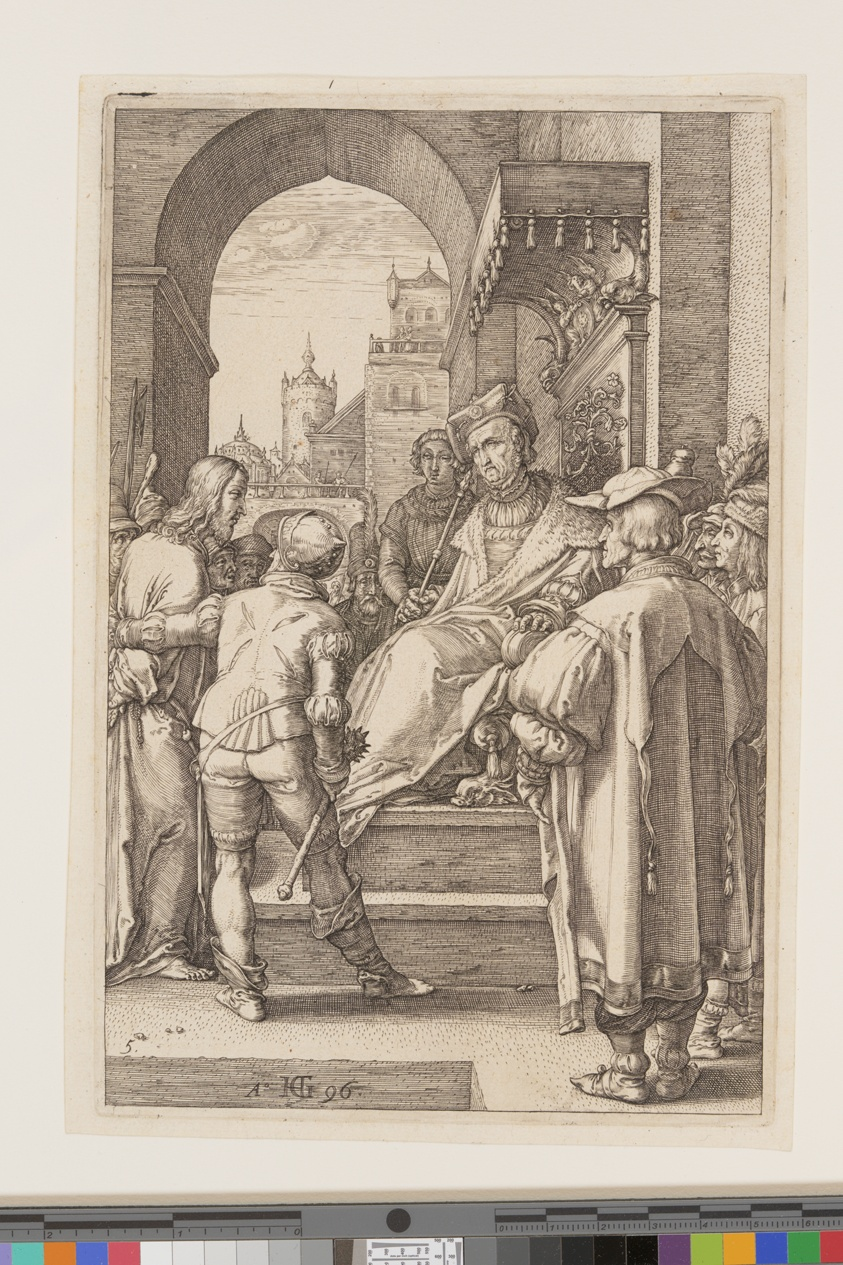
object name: Print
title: Christ before Pilate, from The Passion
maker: Hendrick Goltzius (Dutch, 1558–1617)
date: 1596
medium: Engraving on ivory laid paper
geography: Netherlands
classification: engraving; paper; print; prints and drawing